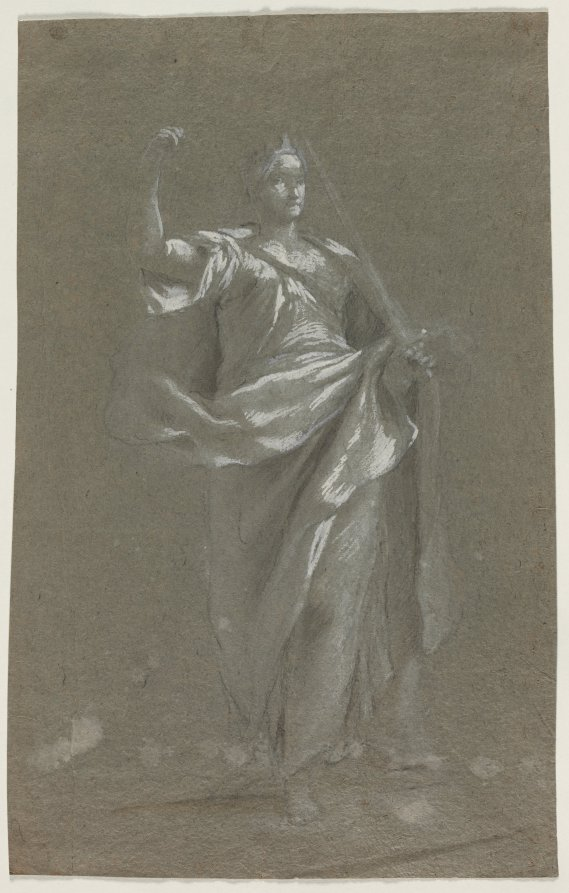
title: Allegorical Figure (recto)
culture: Italy, style of 17th century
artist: Anonymous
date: 1800s?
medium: black chalk and brush and brown and gray wash heightened with white and gray gouache, with traces of stylus and white chalk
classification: Drawing